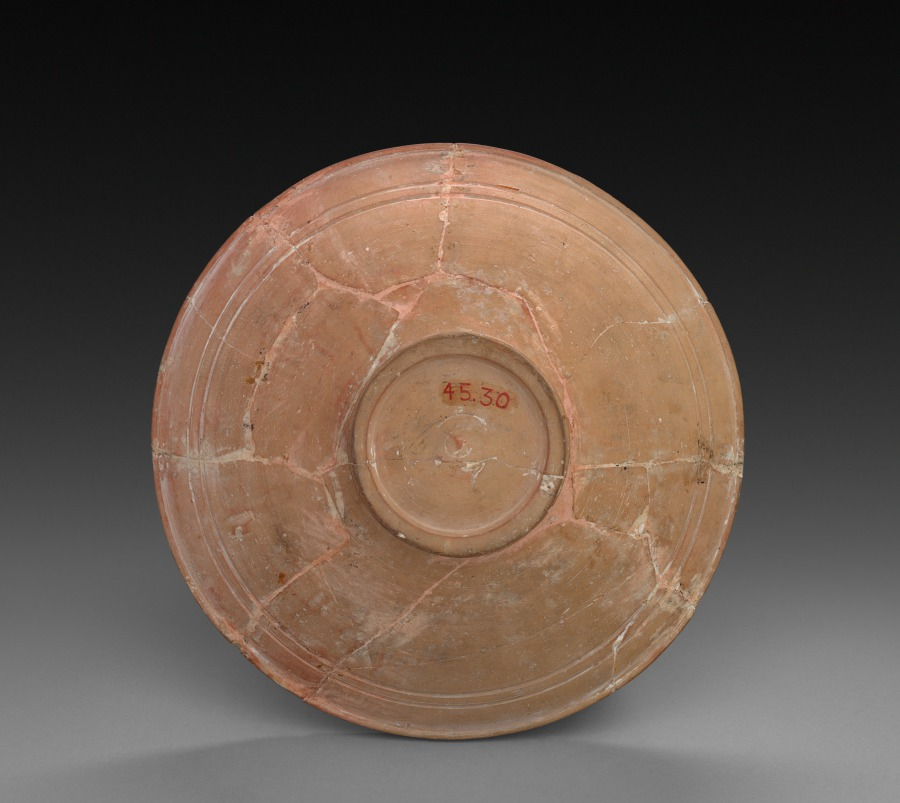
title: Bowl with Peacock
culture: Spain, Paterna, 14th century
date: 1300s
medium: tin-glazed earthenware (maiolica)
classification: Ceramic